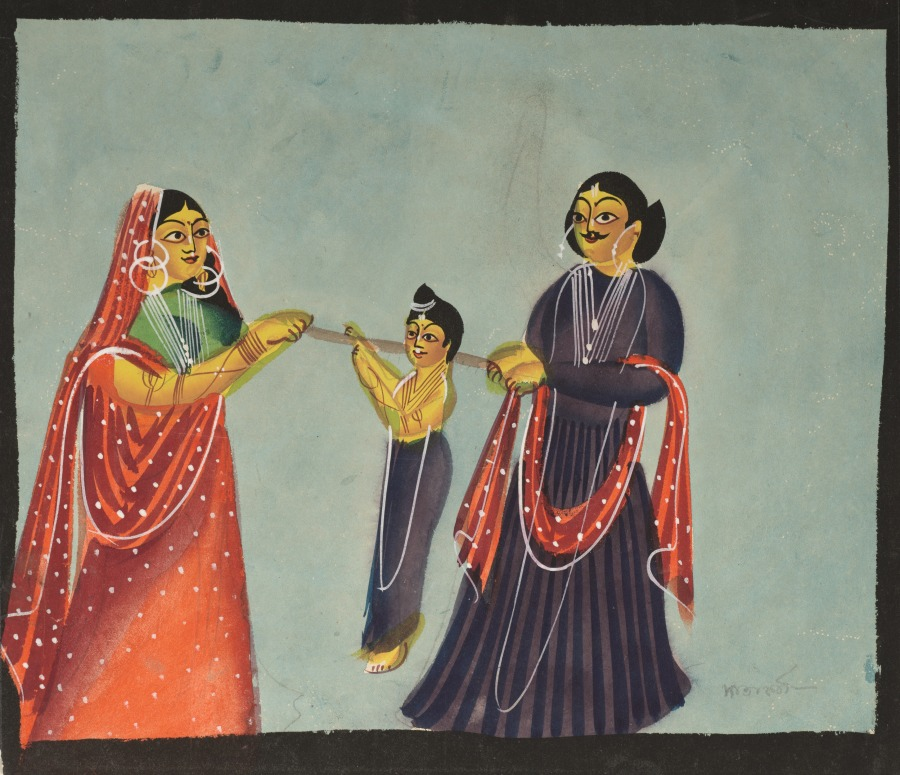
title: Kalighat Painting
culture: Eastern India, Bengal, Kolkata, Kalighat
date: c. 1890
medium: Gum tempera, graphite, and ink on paper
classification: Painting